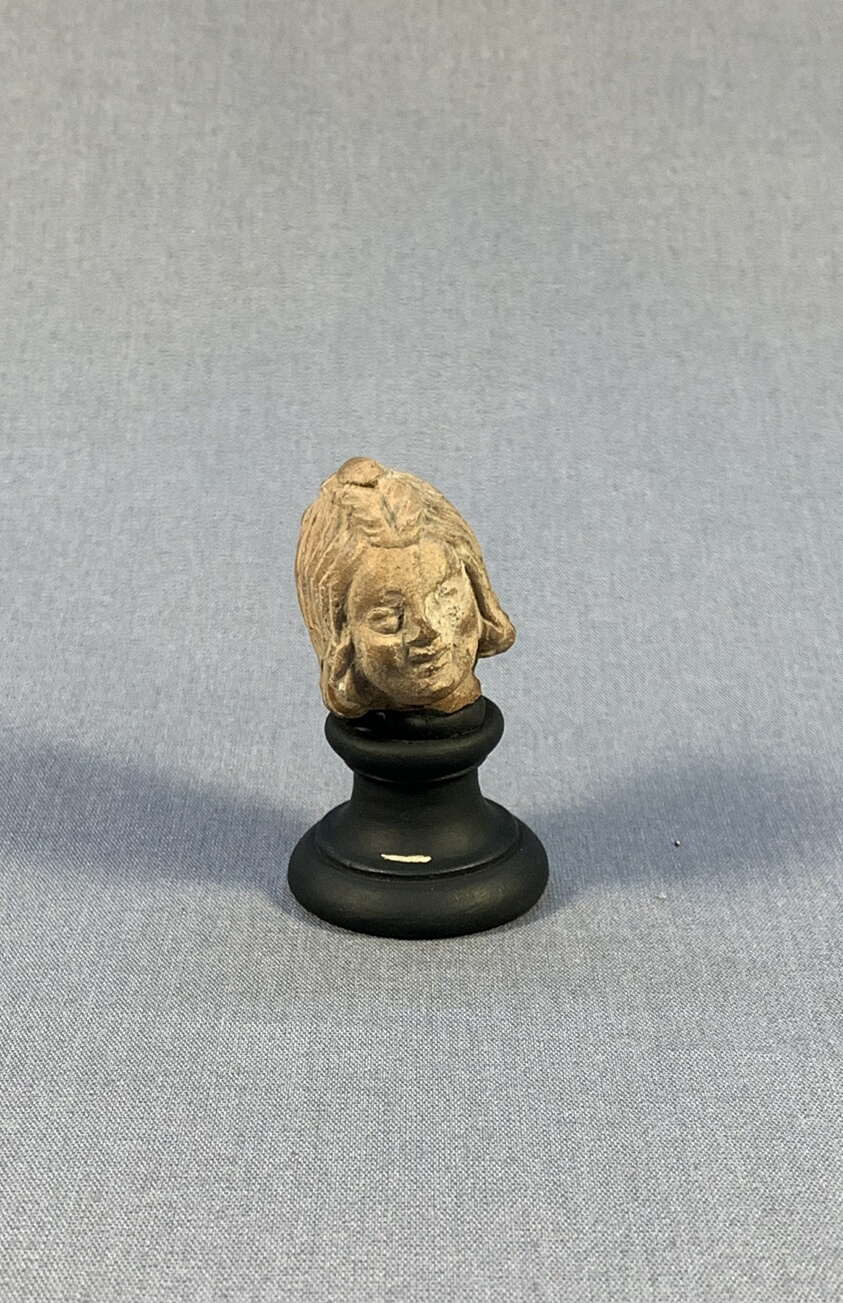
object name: Sculpture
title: Head of a Child or Woman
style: greek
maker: Greek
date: 2nd-1st century BCE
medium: terracotta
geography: Greece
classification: earthenware; ceramics; sculpture; ancient art